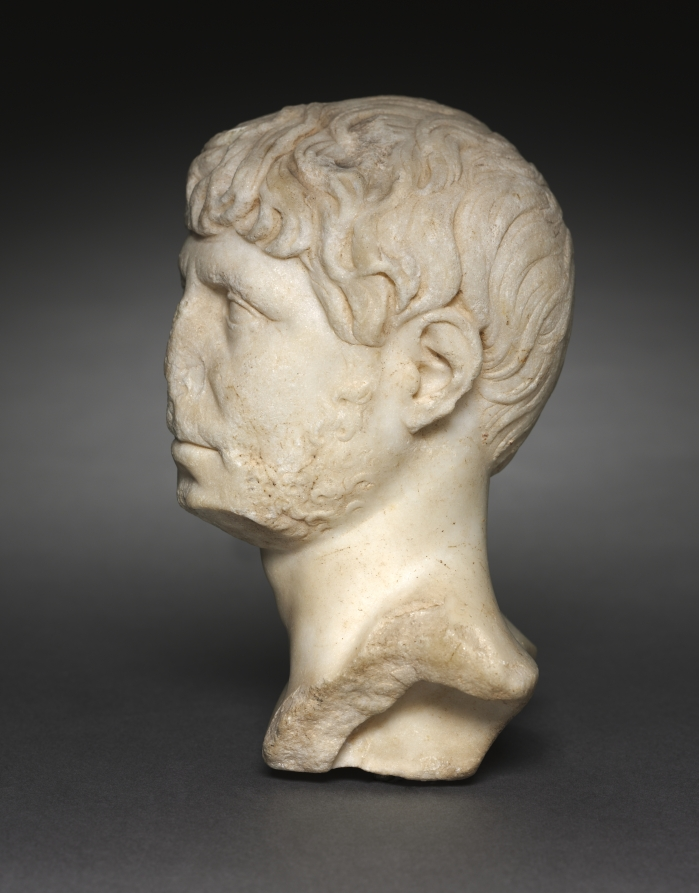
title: Head of a Bearded Man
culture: Italy, Roman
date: c. 125 CE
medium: marble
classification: Sculpture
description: This small-scale portrait depicts a bearded man turned toward his left. His close-cropped hair is combed forward in artful waves, echoed in his short beard. While parts of the chest and shoulders have been lost, the projecting element underneath suggests this portrait was intended as a bust. Beards were uncommon in Rome until the emperor Hadrian (r. 117–38 CE) popularized them during his reign. This man’s grooming is so similar to the emperor’s that he was first thought to be Hadrian; however, the face is too angular. Wealthy and noble Romans would often depict themselves with the same styles as the imperial family.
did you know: This head was probably originally displayed against a wall or in a niche.